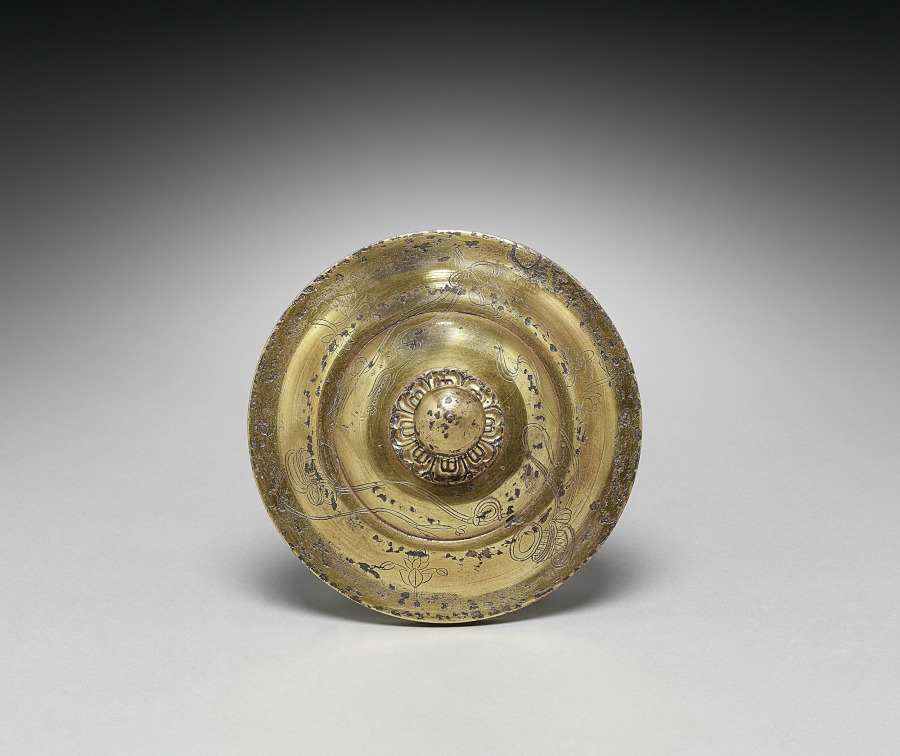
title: Cinerary Urn with Amida’s Pure Land (lid)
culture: Japan, Heian period (794–1185)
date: 800s-900s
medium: gilt bronze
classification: Metalwork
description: This urn once held someone’s ashes. It is decorated with images of the Pure Land of Amida, the Buddha of Infinite Life and Light. Heian-period devotees of Amida believed that if they called upon his name with sincerity at the moment of death, they would be born into his Pure Land, also known as the Western Paradise, and thereby escape the pattern of reincarnation. As shown on the lid of the urn, in the Pure Land, musical instruments float about playing by themselves. Its palatial structures and magnificent lotus pond are described on the body of the urn.